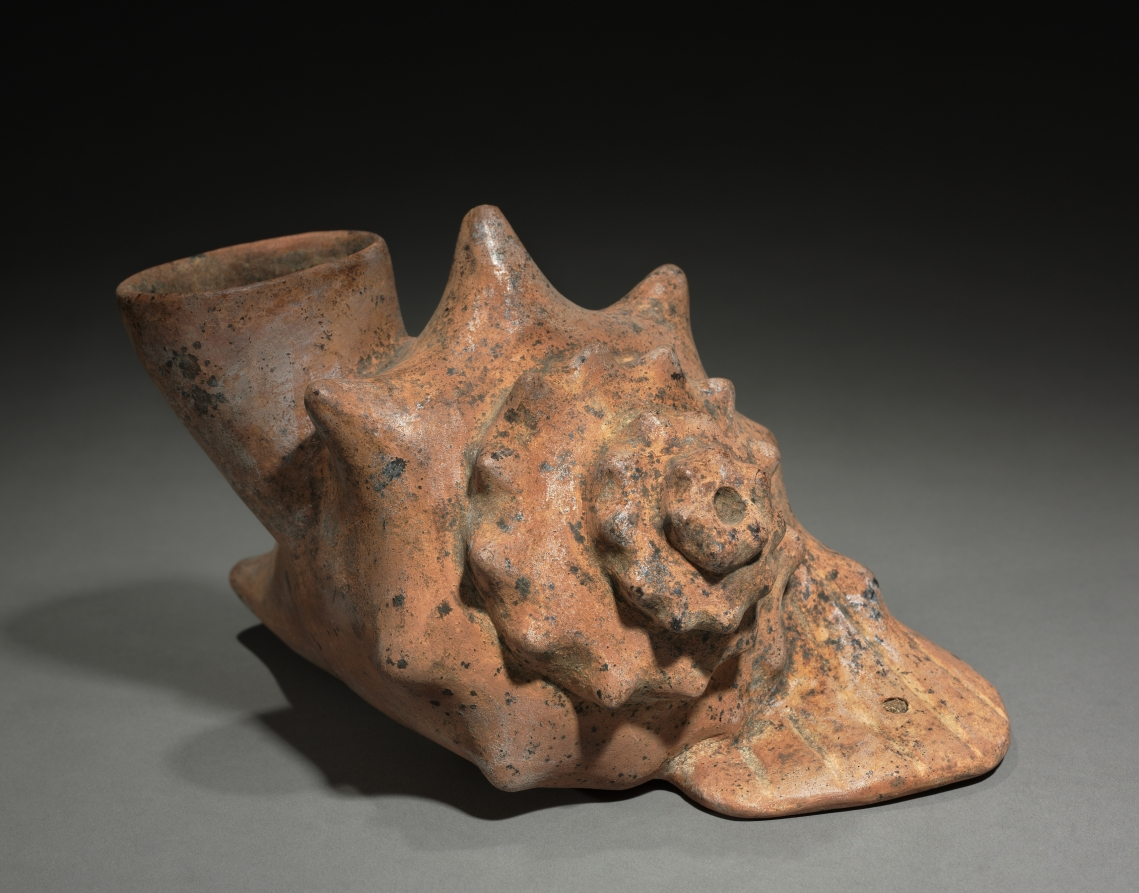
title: Conch Shell Trumpet Vessel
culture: West Mexico, Colima, Comala style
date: 200 BCE–300 CE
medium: earthenware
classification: Ceramic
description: Conch shell trumpets were used during many kinds of important events throughout the ancient Americas. The shells were converted to trumpets by removing the tip to form a mouthpiece, as this ancient ceramic replica of a trumpet shows. Holes were often drilled in the shell for a carrying cord.